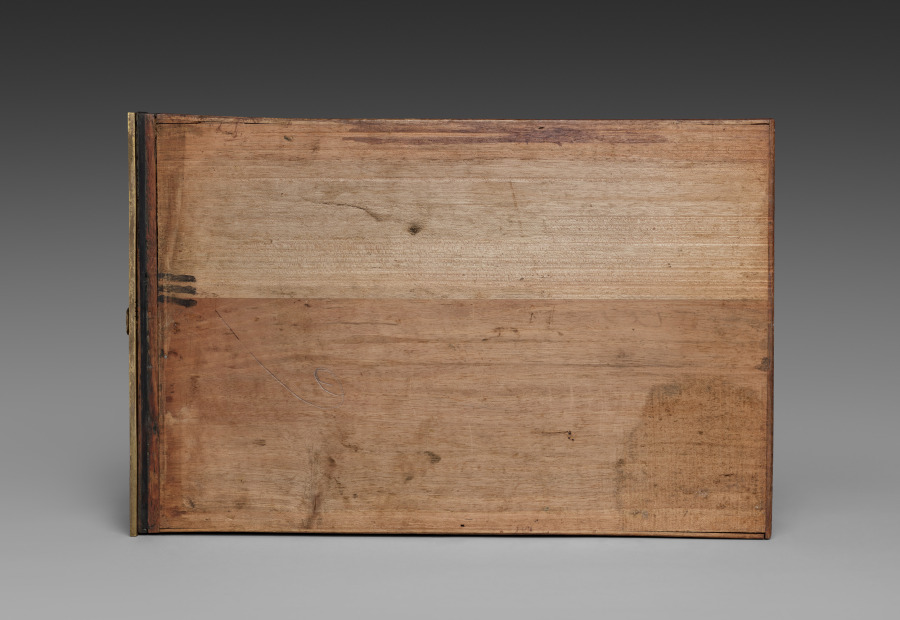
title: Side Drawer for Cabinet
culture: France, late 17th Century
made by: André-Charles Boulle (French, 1642–1732)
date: c. 1690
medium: ebony, marquetry in metal and tortoise shell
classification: Furniture and woodwork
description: Appointed cabinetmaker to King Louis XIV in 1672, André-Charles Boulle became a master of furniture making in France during the late 1600s until his death in 1732. Known primarily for his use of marquetry, in which metal patterns are inlaid into tortoiseshell then applied within the veneered surface of the furniture, Boulle established a level of quality and craftsmanship few others could achieve. As a result, his work found favor at the royal court and among other aristocrats and diplomats eager to impress the king. The inclusion of a medallion depicting Louis XIV within the bronze decoration of this chest would have identified the owner with the royal court. Often exhibiting stout architectural proportions with elegant groups of inlaid motifs such as the parrot on the central panel of this chest, Boulle’s designs are an example of the intellectual fashion for contrasting ideas, materials, and motifs.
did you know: Originally designed to sit atop an elaborate tall stand, this chest was likely altered in the late 1700s to reduce its scale and height.